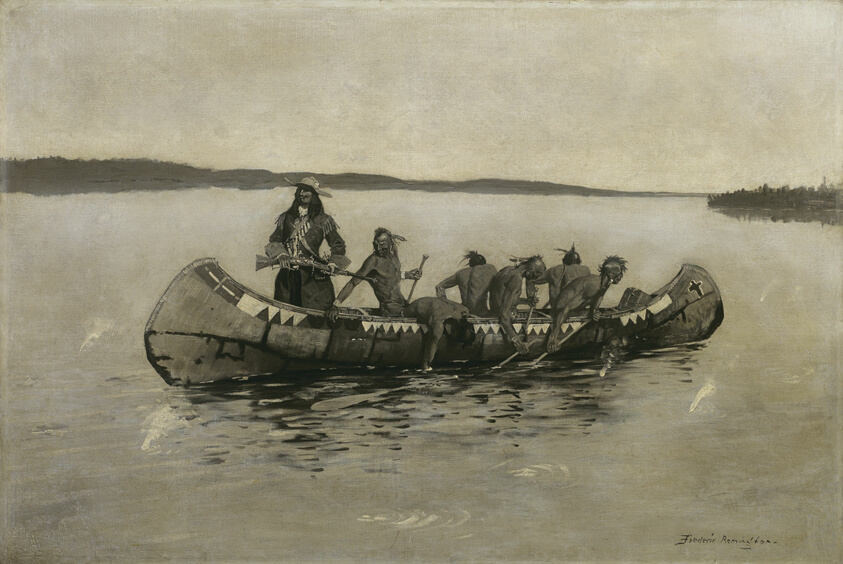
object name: Painting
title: This Was a Fatal Embarkation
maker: Frederic Remington (American, 1861–1909)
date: 1898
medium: Oil on canvas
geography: New York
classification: painting; american arts